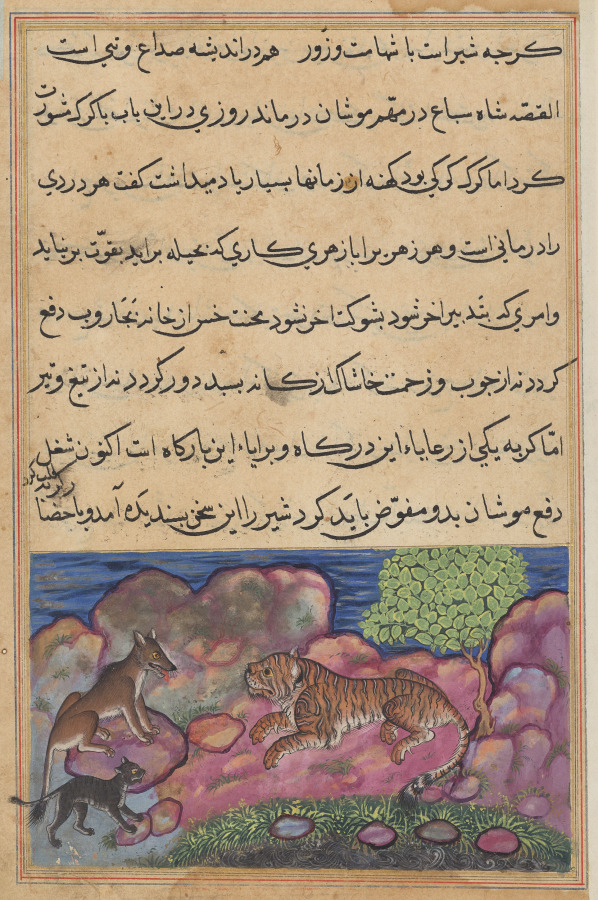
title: The wolf advises the lion to consult the cat, from a Tuti-nama (Tales of a Parrot): Fifteenth Night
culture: Mughal India, court of Akbar (reigned 1556–1605)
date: c. 1560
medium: gum tempera, ink, and gold on paper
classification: Painting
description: The painting depicts an old tiger, crouching under a tree by a stream looking plaintively at a wolf, with whom he has just shared his troubles with the mice. The wolf suggested that the cat be called to eliminate the mice. The cat has dutifully arrived and requests that he be given the position of Magistrate of the Court, to which the lion agreed. The cat instilled fear in the mice; they dispersed, and the lion was content. Wisely, however, the cat treated the mice with consideration and did not exterminate them completely, so that he would not eliminate the cause of his usefulness. Although the rocky landscape is heavily shaded in a technique that gives them a soft quality, and the leaves of the tree are each outlined in gold, the lack of any actual shadows from an identifiable light source provides a timeless appearance to the scene.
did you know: The same word is used in Persian for both “lion” and “tiger.”